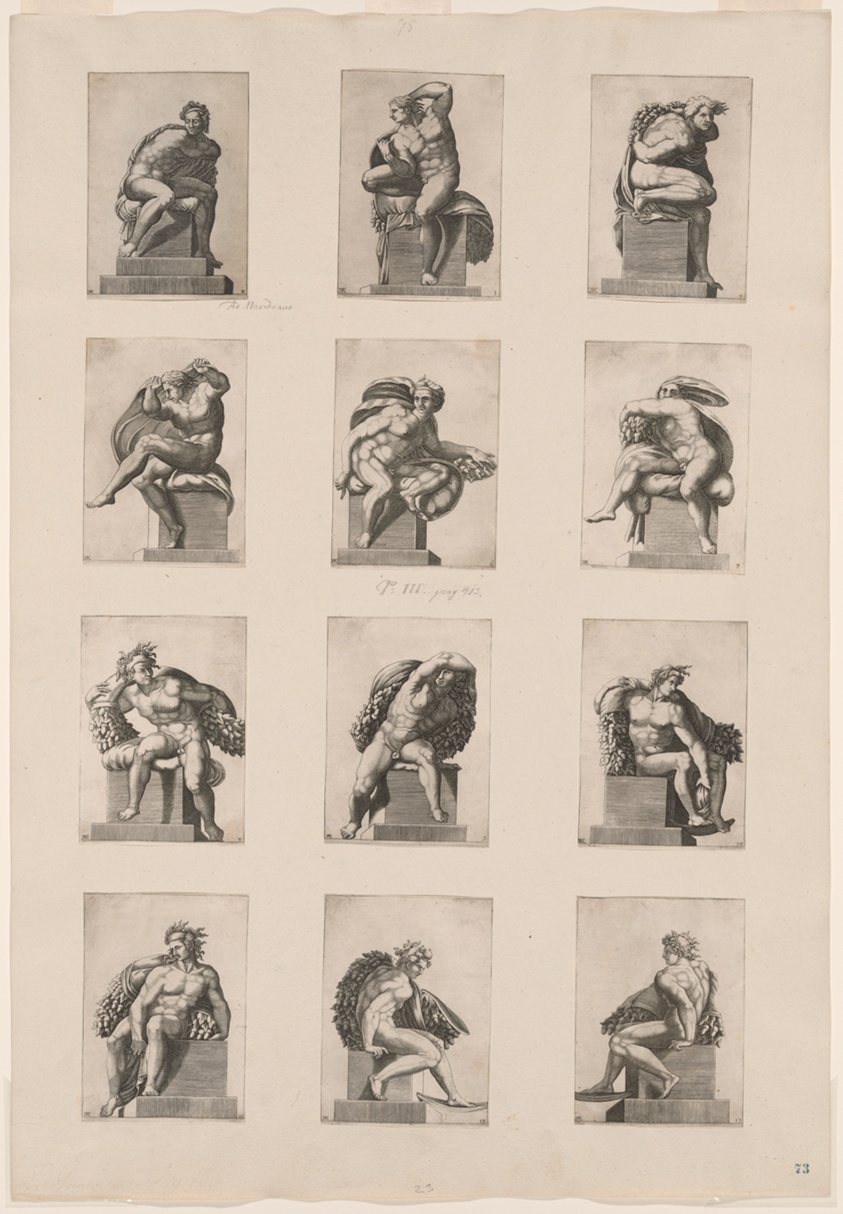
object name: Print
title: Figures from the Ceiling of the Sistine Chapel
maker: Adamo Scultori (Italian, c. 1530–1585); after Michelangelo Buonarroti (Italian, 1475–1564)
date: 1550/65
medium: 12 engravings in black on cream laid paper, tipped onto album sheet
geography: Italy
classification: engraving; paper; prints and drawing; print